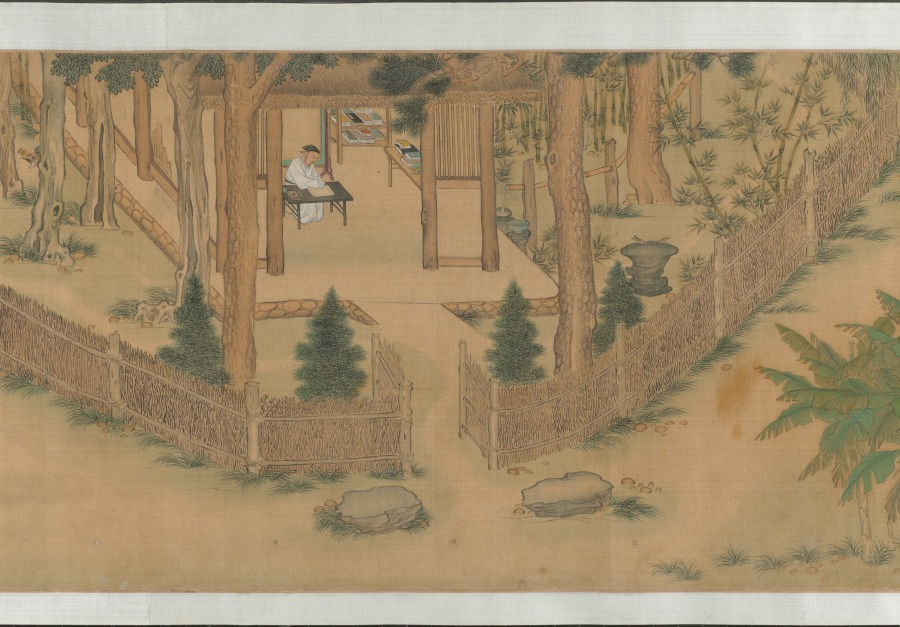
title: Garden for Solitary Enjoyment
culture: China, Ming dynasty (1368–1644)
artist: Qiu Ying (Chinese, 1494–1552)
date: 1515–52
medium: Handscroll; ink and light color on silk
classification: Painting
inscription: Accompanying text of an essay together with seven poems of Sima Guang (1019–1086) and one poem of Su Shi (1037–1101) written by Wen Zhengming (1470–1559) in 1558.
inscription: 2 colophons and 82 seals: 4 seals of Wen Zhengming 文徵明 (1470–1559); 59 seals of Xiang Yuanbian 項元汴 (1525–1590); 1 colophon, dated 1644, and 7 seals of Xiang Yukui 項禹揆 (c. late 1500s–1659); 1 colophon, dated 1880, and 2 seals of Weng Tonghe 翁同龢 (1830–1904); 2 seals of Ch'eng Chen-i (19th c.); 1 seal of Han Ch'ung (19th c.); 4 seals of Wan-go H. C. Weng 翁萬戈 (1918–2020); 3 seals unidentified.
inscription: Colophon by Xiang Yukui 項禹揆 (c. late 1500s–1659): The painting of The Garden for Self-enjoyment on the right by Shih-chou, Mr. Qiu [Qiu Ying] is in the style of Li Lung-mien. Its mood is peaceful, as if meeting the ancient gentlemen face to face among the brushes and silk; it lifts one above the sordid bustle of life. Formerly, my late father handed me this scroll which had only the painting without the written essay. I considered asking a good calligrapher to write the essay to add to it but was afraid that the quality of the writing would not match the painting. Several years later, I saw at a friend's house this essay and poems (of Ssu-ma Kuang] written by Hengshan [Wen Zhengming], once owned by my grandfather; so I spared no expense to obtain it. I rejoiced at this and said: "The divine swords are finally united. How things are pre-destined!" Now my friend Chang Kung-chao's technique for mounting [painting and calligraphy] is excellent. Therefore by daring to take them out and join them together, I can preserve this beautiful story of singular reunion. Xiang Yukui recorded at Hai-yeh-t'ang [hall] two days before New Year's Eve in the jiasheng year of the Chongzhen era [1644]. trans. LYSL/HK/WKH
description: Garden of Solitary Enjoyment refers to a site built in 1073 by the statesman Sima Guang (1019–1086) after he had retired to Luoyang, Henan province. Every spring, visitors would flock to his garden. Each of its seven structures references a historic figure. Sima wrote: I channel streams [like Du Mu], to water flowers [like Bai Juyi], or trim bamboo [like Wang Huizhi]. . . . I know of no joy between heaven and earth that could take its place. Qiu Ying’s painting, created after an 11th-century version of the same theme, must have appealed to garden owners of the Ming dynasty, since it became the template for numerous Suzhou workshop copies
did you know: Sima Guang completed his monumental survey of Chinese history, Zizhi tongjian, in the garden depicted in this painting.